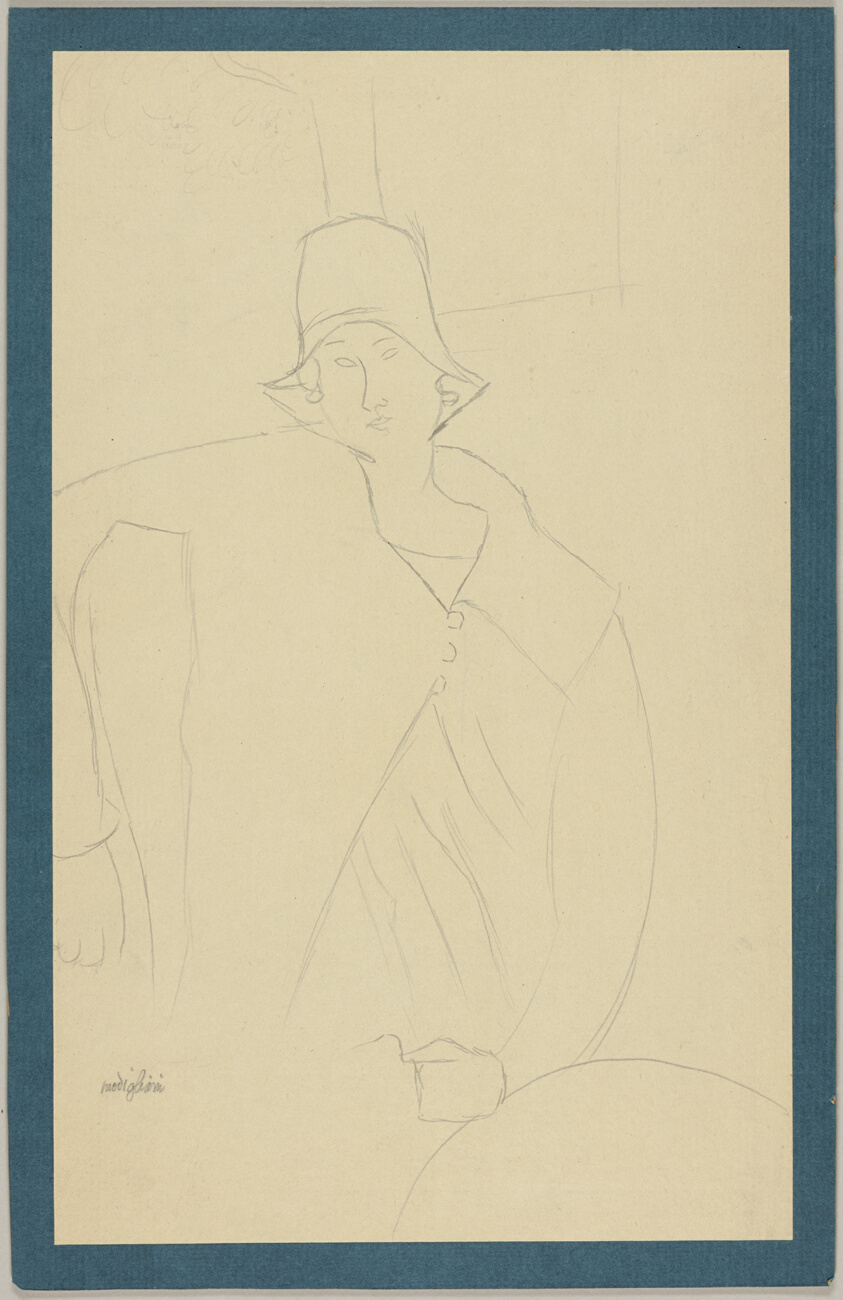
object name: Drawing and Watercolor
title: Seated Woman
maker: Amedeo Modigliani, style of; Italian, 1884-1920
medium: Graphite on cream laid paper, laid down on blue wood-pulp laminate board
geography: Italy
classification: graphite; drawings (visual works); prints and drawing